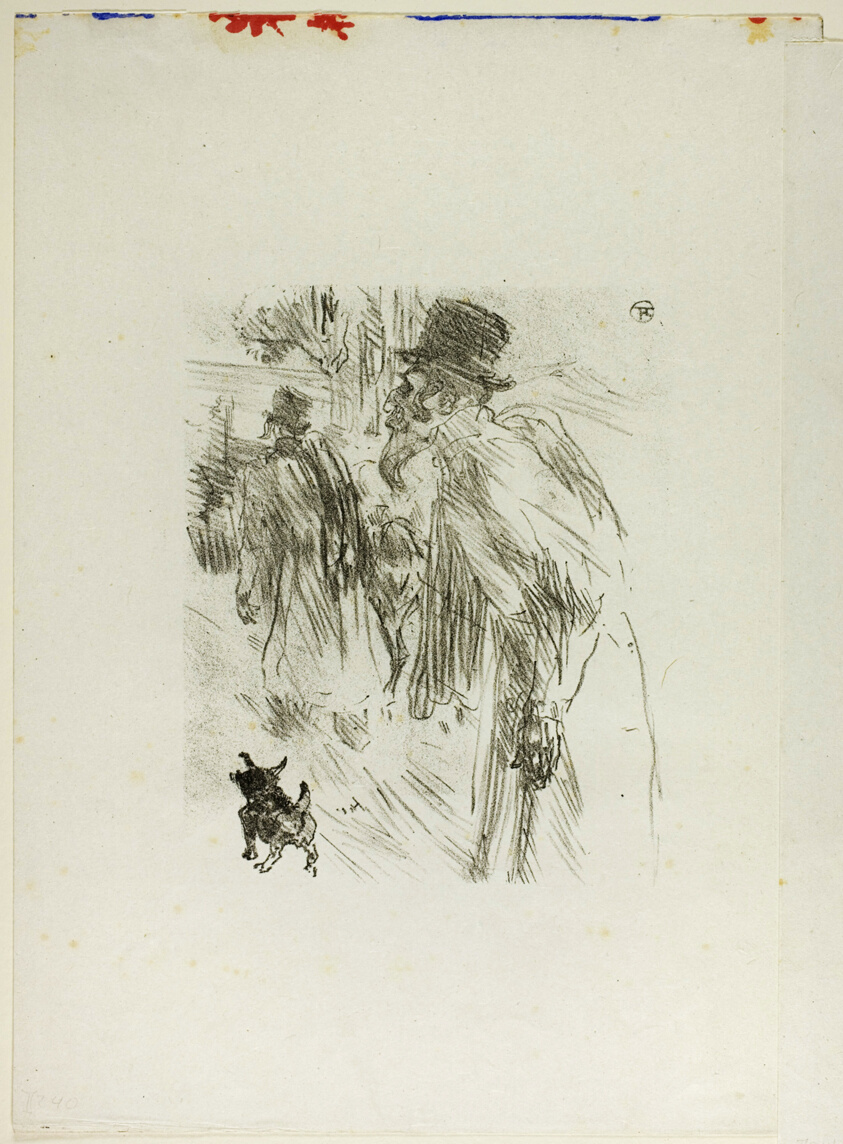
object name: Print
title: Polish Jews, Carlsbad, from Au Pied du Sinaï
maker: Henri de Toulouse-Lautrec (French, 1864-1901)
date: 1897, published 1898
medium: Lithograph on ivory wove paper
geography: France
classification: lithograph; print; prints and drawing